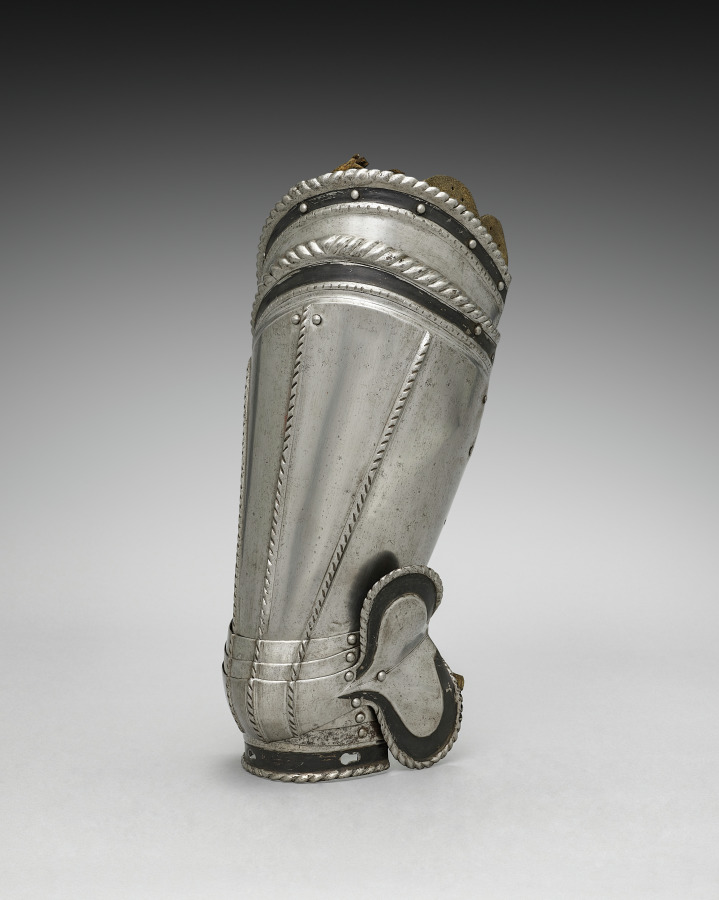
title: Left Cuisse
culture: Germany, 19th century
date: 1801–1900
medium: steel with black paint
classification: Arms and Armor